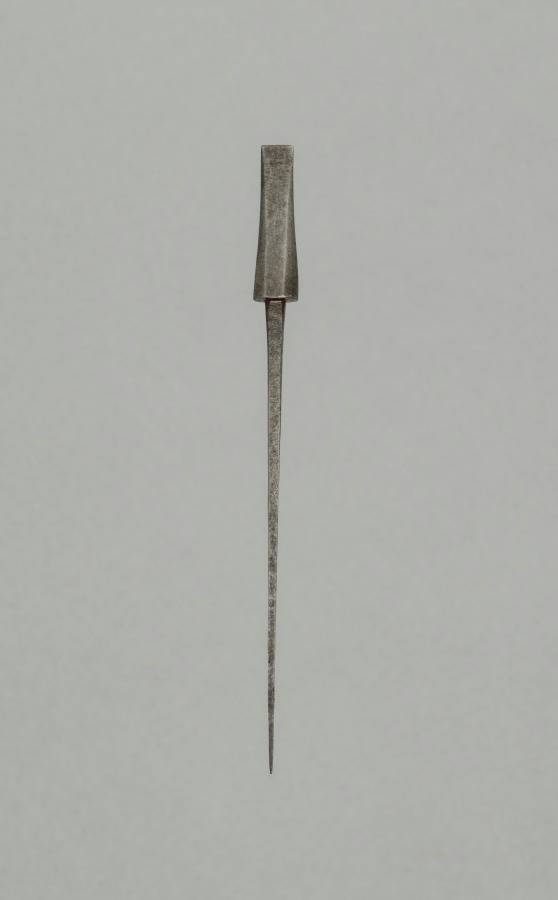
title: Arrow Point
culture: Japan, Edo period (1615–1868)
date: 1700s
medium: steel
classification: Arms and Armor